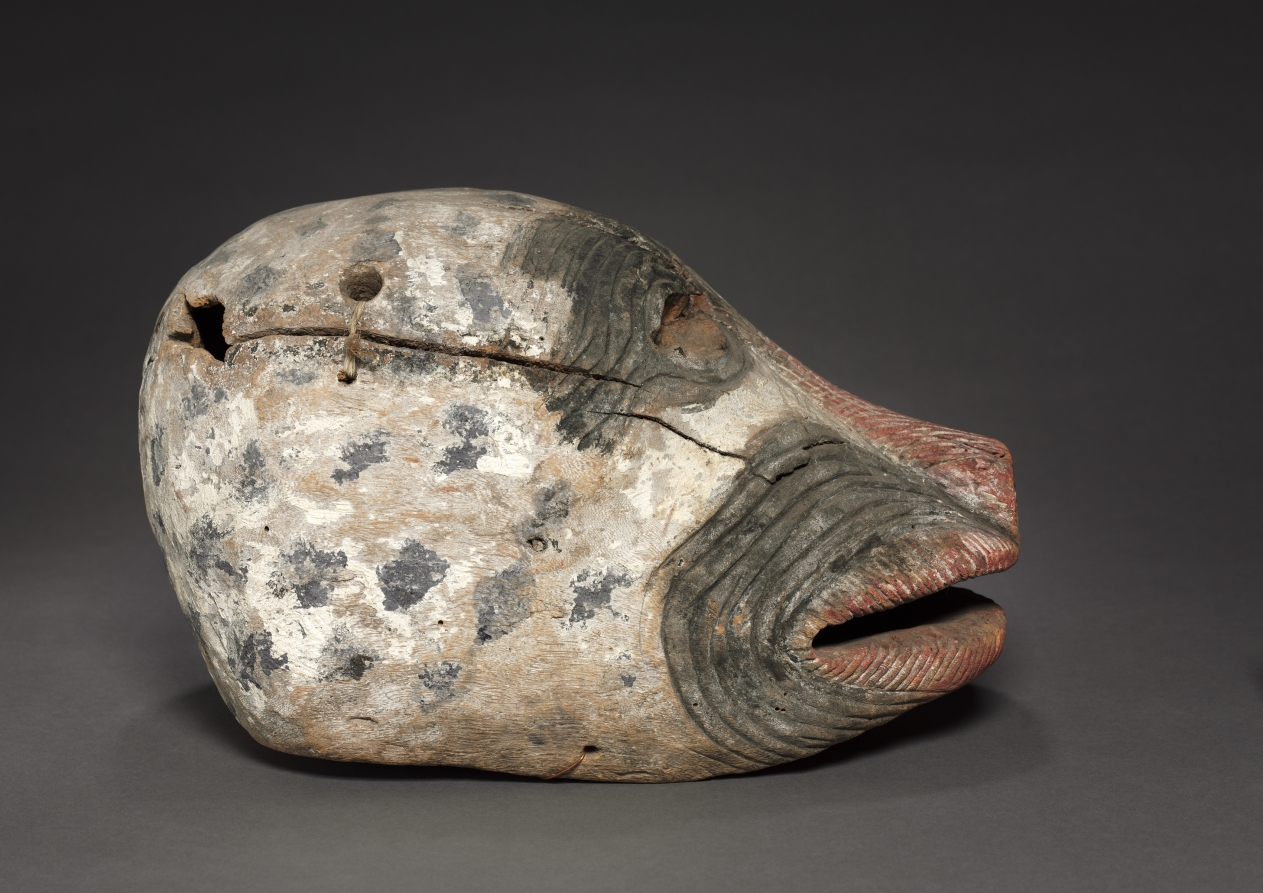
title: Mask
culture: Mexico, Paintla, 19th century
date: 1800s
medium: wood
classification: Sculpture